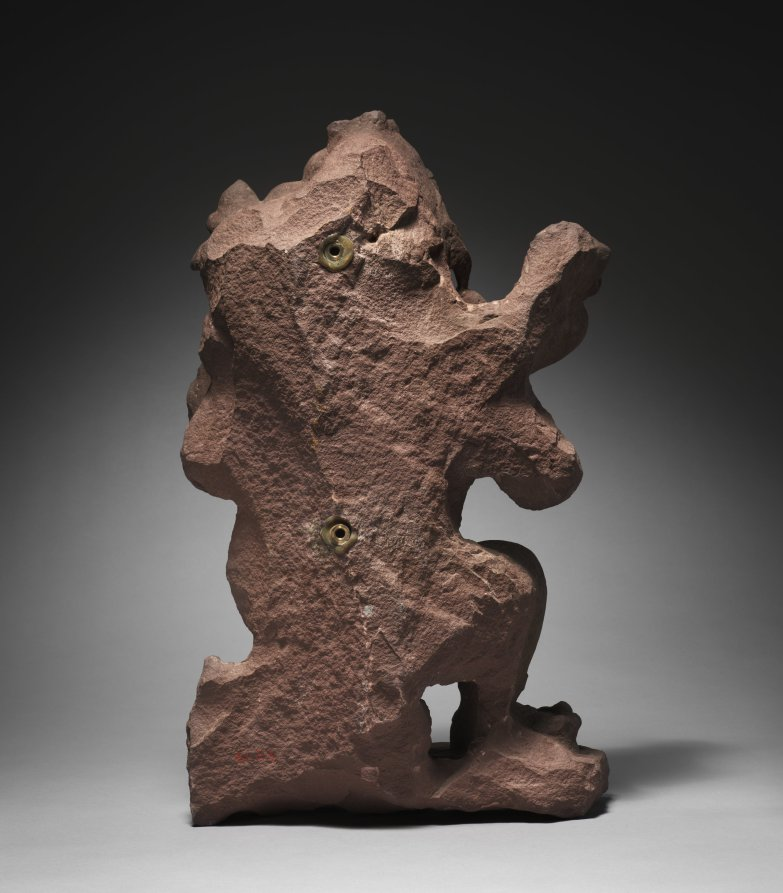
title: Dancing Ganesha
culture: Central India, Madhya Pradesh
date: c. 1000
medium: sandstone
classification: Sculpture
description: The name Ganesha means "lord (isha) of the demonic dwarfs (gana)," part of Shiva's entourage. They dance and imitate Shiva in humorous ways that inspire his followers' affection. In this sculpture Ganesha's dance mimics the dance of Shiva. Ganesha has six arms instead of four, and he holds a bowl of sweet cakes and a radish instead of a tongue of flame.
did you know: Ganesha's mount is the rat, which evokes full granaries and the prosperity and abundance that they imply.